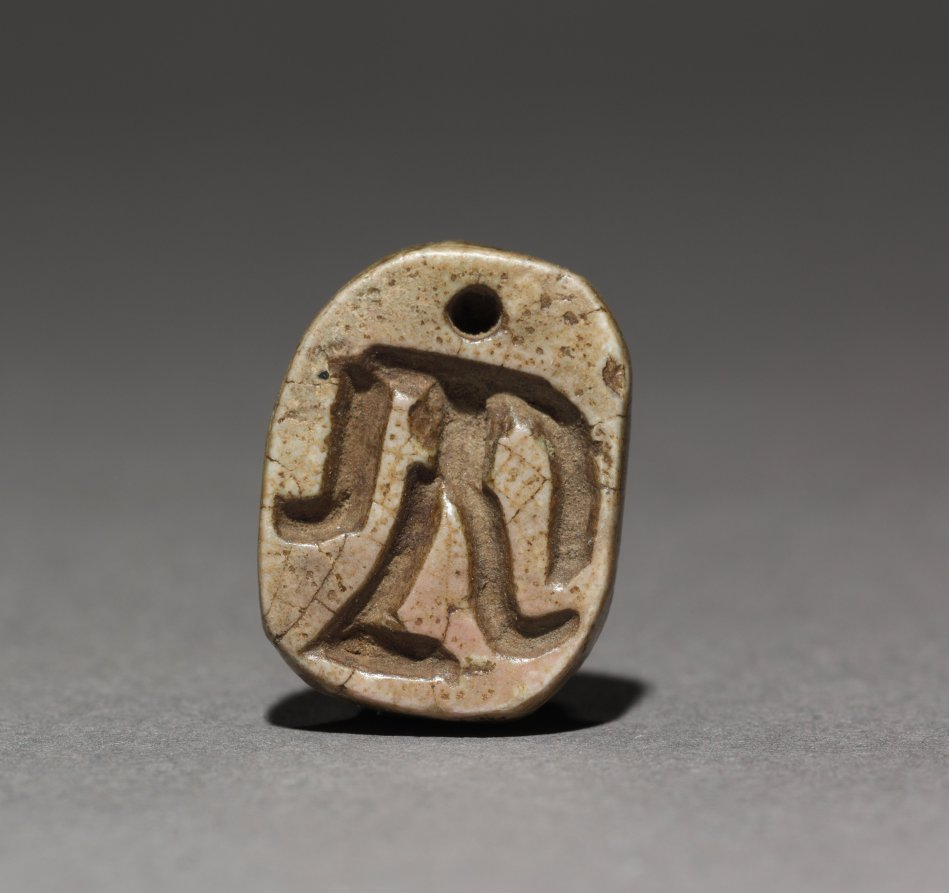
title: Seal Amulet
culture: Egypt, First Intermediate period (2123–2040 BCE), Dynasty 8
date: 2134–2124 BCE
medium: steatite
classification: Amulets